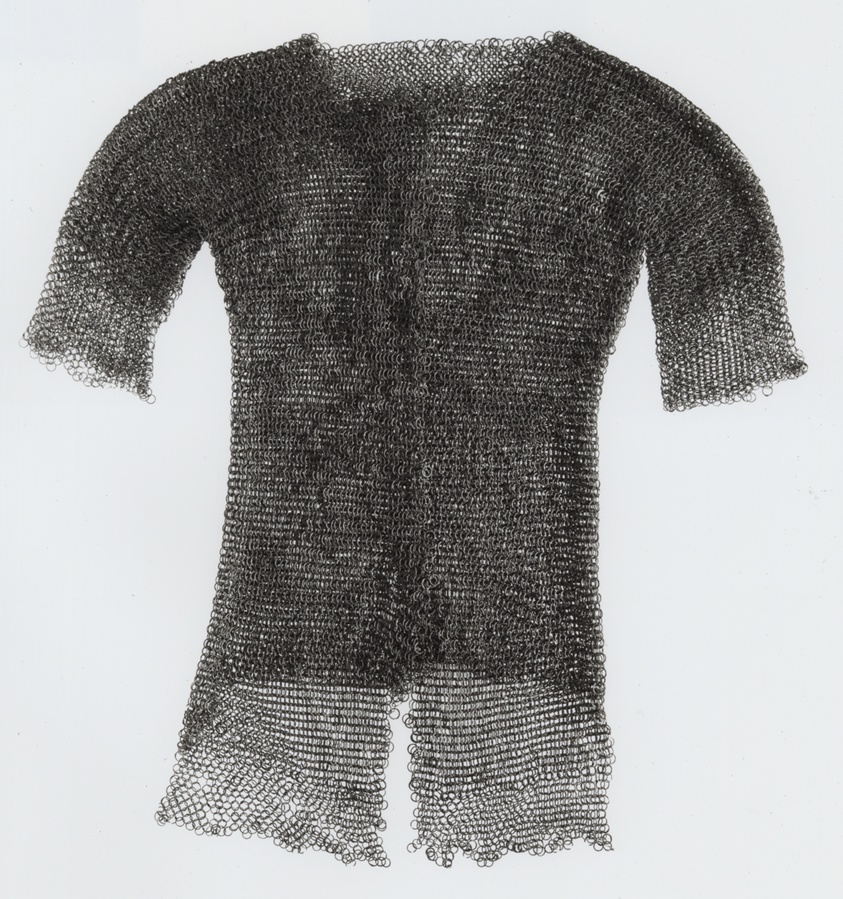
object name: Armor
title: Shirt of Mail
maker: European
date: mid–16th century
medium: Iron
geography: Middle East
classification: suit-element; armor; arms and armor